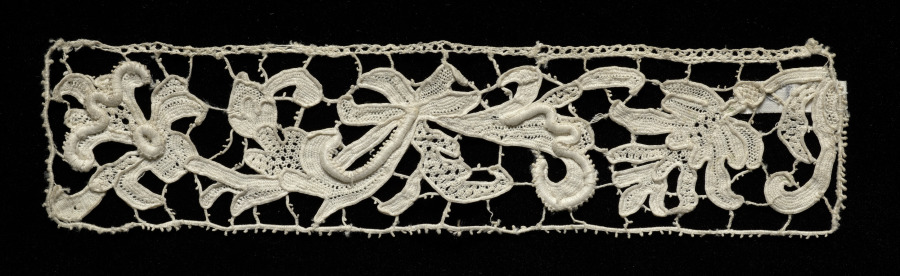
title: Lace fragment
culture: Spain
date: 1600s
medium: Needle lace (Punto in aria) insertion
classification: Lace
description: The motifs seen in this fragment are based on Venetian Raised Point design.